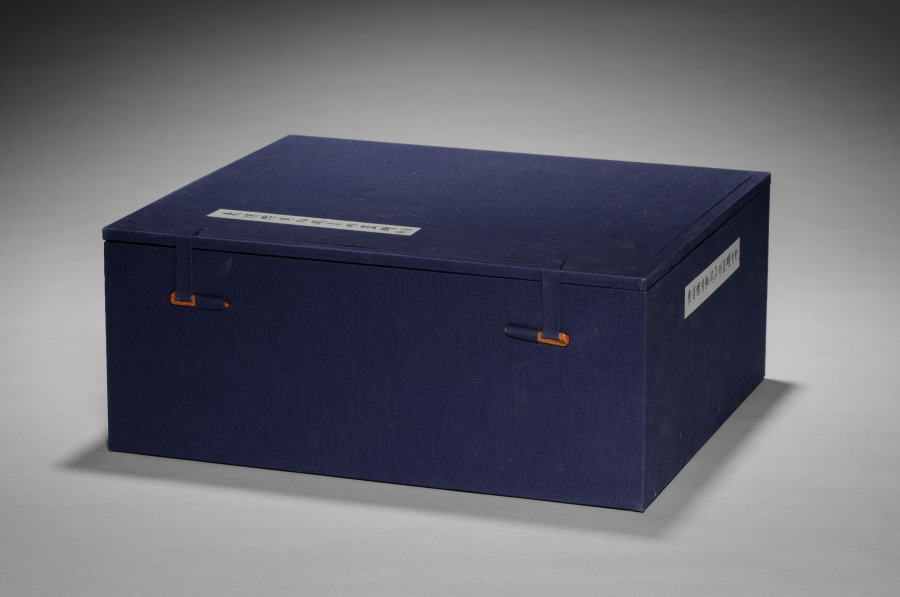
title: Pair of Owl-shaped Jars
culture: China, Henan province, Western Han dynasty (206 BCE–8 CE)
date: 206 BCE–9 CE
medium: Amber-brown glazed low-fired pottery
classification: Ceramic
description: Pottery vessels in the shape of owls were made since Neolithic times and throughout the Bronze age. These jars in the form of vigilant owls may have provided a tomb occupant with grain in the afterlife. However, the meaning of these mysterious birds and the association of the owl motif with burial sites in China is not fully understood.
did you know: Each jar cover is modeled in the shape of an owl's head.